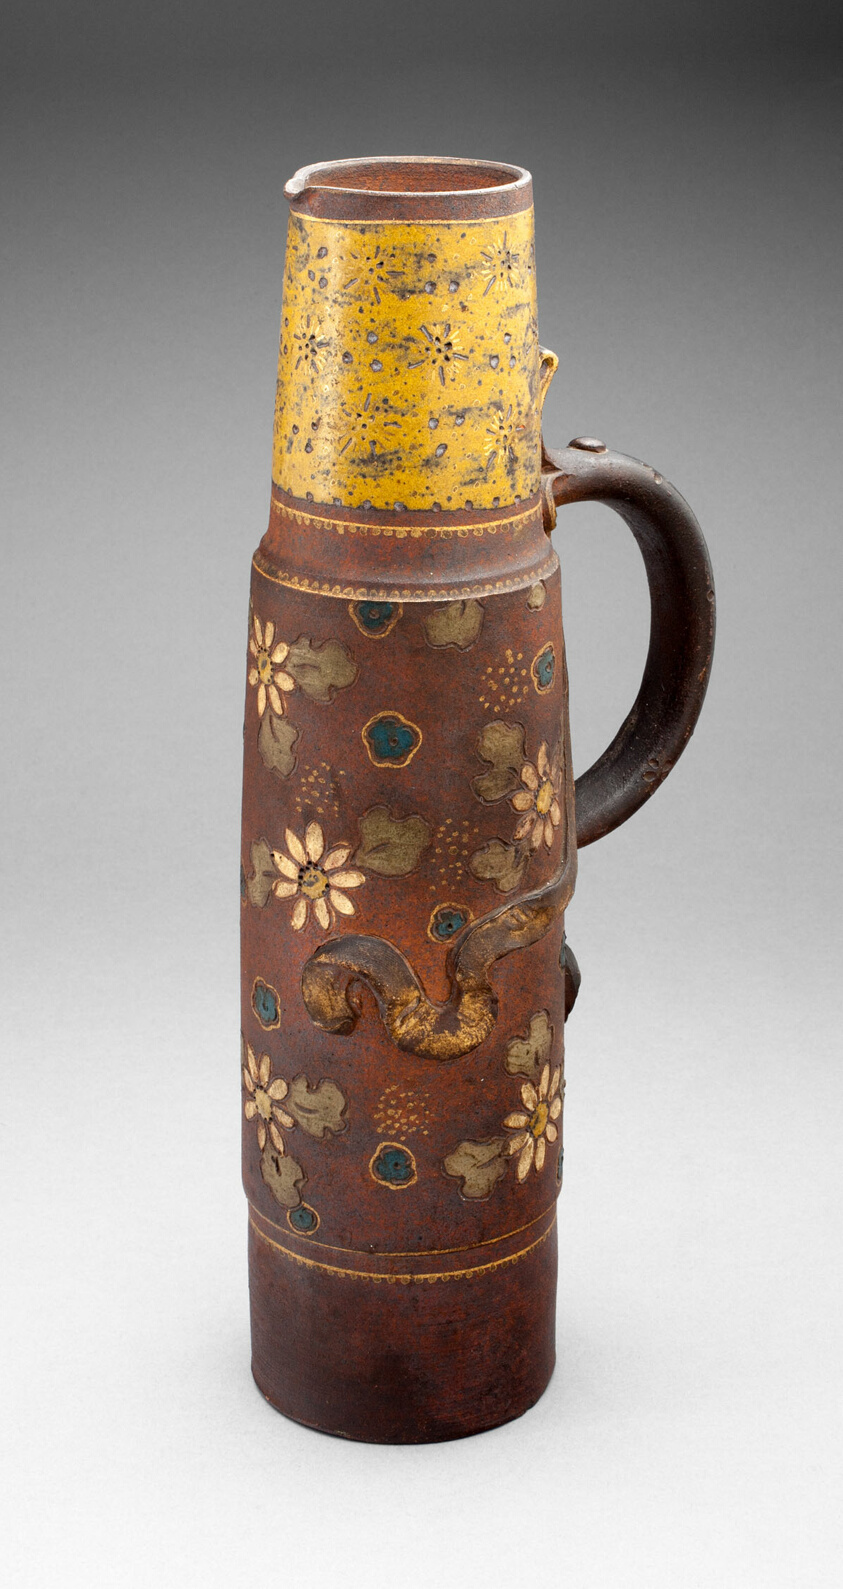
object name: Ceramics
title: Ewer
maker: Designed by Ernest Chaplet (French, 1835-1909); Made by Haviland & Co., Auteuil Studio, Paris (French, 1872-1886)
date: 1885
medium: Enameled stoneware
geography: France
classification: ewer (vessel); vessel; ceramics